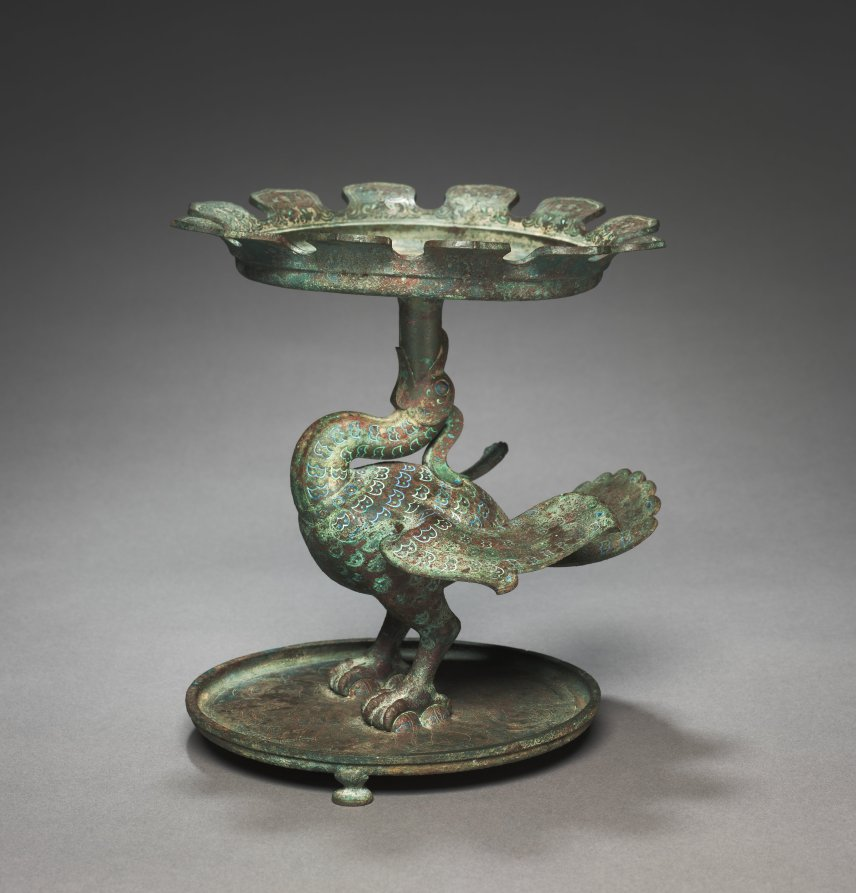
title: Shallow Basin Supported by a Bird (Bian)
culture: China, Warring States period (475–221 BCE)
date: early 400s BCE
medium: bronze inlaid with powdered malachite and azurite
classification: Metalwork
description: The bird, in its graceful and dignified pose, firmly grasps a pair of intertwined serpents cast in the lower basin. This composition of the bird's triumph over the serpent has been given various interpretations. The Chinese ethnographers regard this as a totemic symbol—a suggestion of a specific clan's superiority over contending neighboring peoples. Other scholars interpret this as good creatures warding off evil influences or as an early manifestation of the concept of complementary pairing (yin-yang, heaven-earth) in Chinese cosmology. The original appearance of this vessel was brilliant and colorful due to the use of malachite and azurite in inlaid decoration, producing red, green, and blue against the bronze surface.